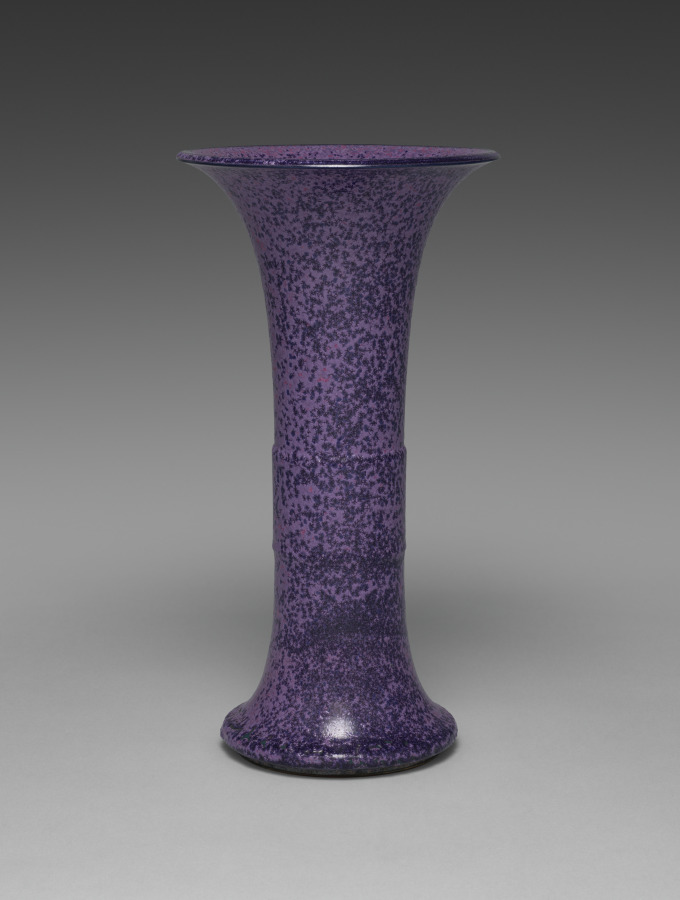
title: Gu-Shaped Vase with Patina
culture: Japan, Taishō period (1912–26) or Shōwa period (1926–89)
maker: Seifū Yohei IV (Japanese, 1872–1951)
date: 1914–46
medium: Porcelain with overglaze color enamel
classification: Ceramic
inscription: 清風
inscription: 成山清風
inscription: 清風造 【印】 清風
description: Yohei IV’s interest in bold, colorful designs is on full display in this purple gu-shaped vase. He not only exhibits his penchant for bold colors but also shows off a complex surface that suggests the patina on an ancient bronze. The body of the vase is a dark, greenish blue over which there is a thick application of color. While the predominant overlaid color is lavender purple, salmon pink and cornflower blue appear in places along with myriad nearly black forms, perhaps floating dandelion seeds or tiny flowers, scattered over the surface.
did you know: The glaze recalls in some respects a Chinese glaze named “snowflake blue,” or xuehualan (Japanese sekka’ai), a low-fired lead-fluxed glaze.